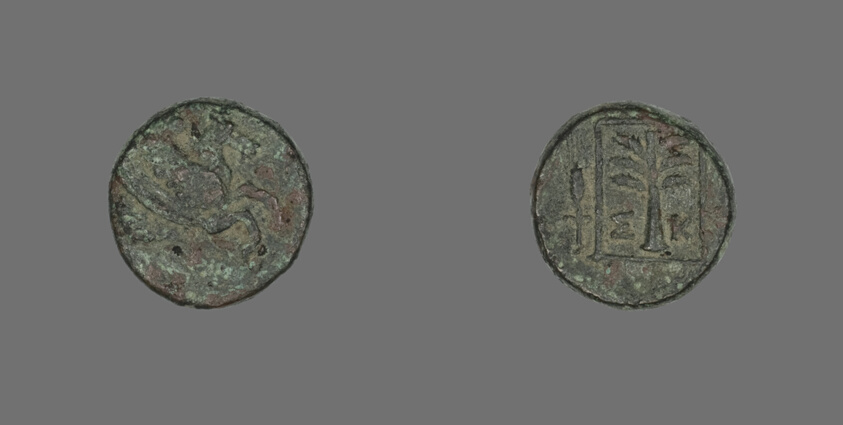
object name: Coin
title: Coin Depicting Pegasus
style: greek, ancient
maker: Greek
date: 4th century BCE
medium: Bronze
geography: Ancient Greece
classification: coin; ancient art